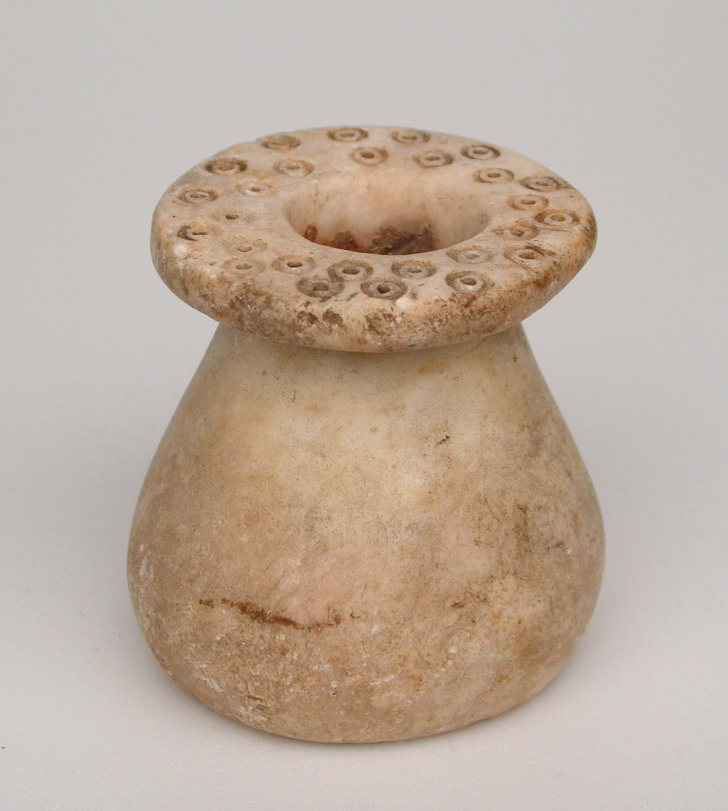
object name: Vessel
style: egyptian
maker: Egyptian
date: New Kingdom, Dynasty 18 (?) (about 1550–1295 BCE)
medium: Travertine (Egyptian alabaster)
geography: Egypt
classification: vessel; stone; ancient art